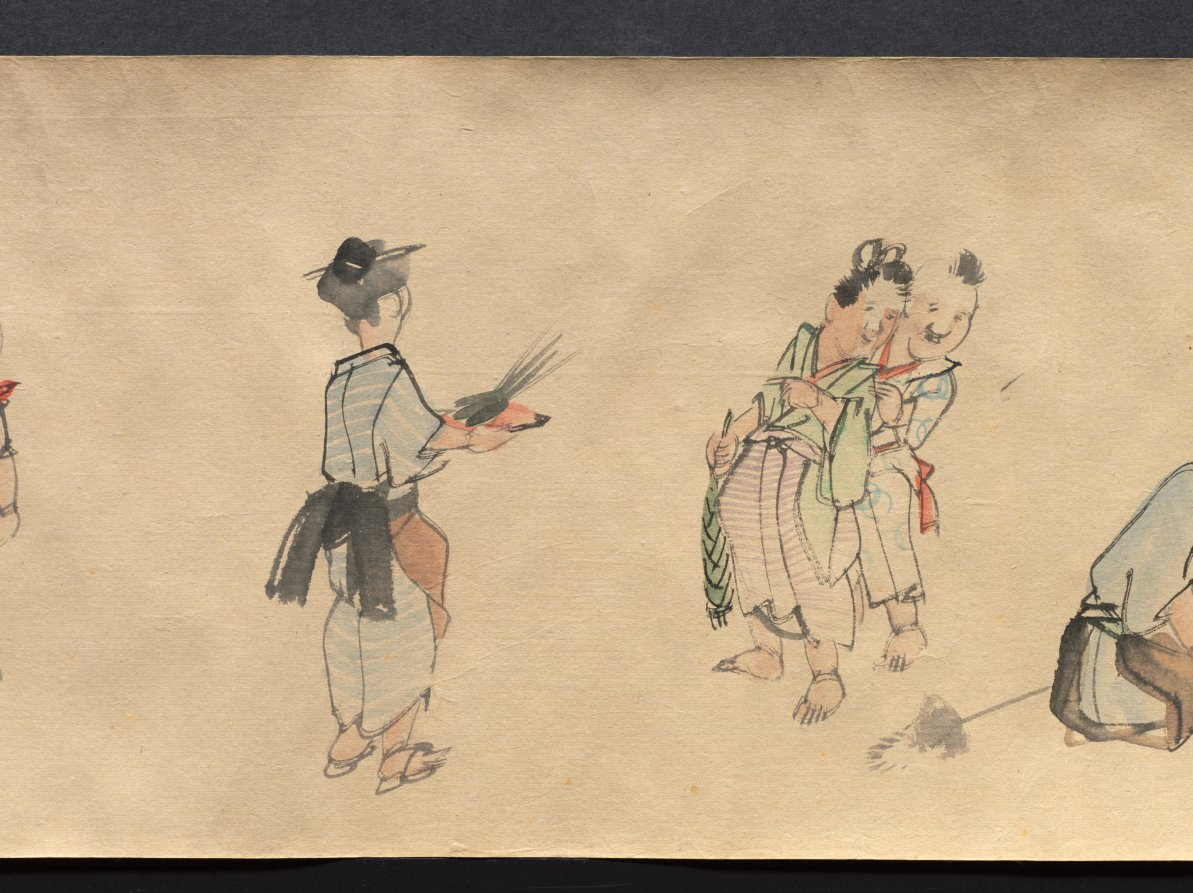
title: Festival Scenes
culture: Japan, Edo period (1615–1868)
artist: Suzuki Nanrei (Japanese, 1775–1844)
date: c. 1795–1844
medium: handscroll; ink and color on paper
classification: Painting